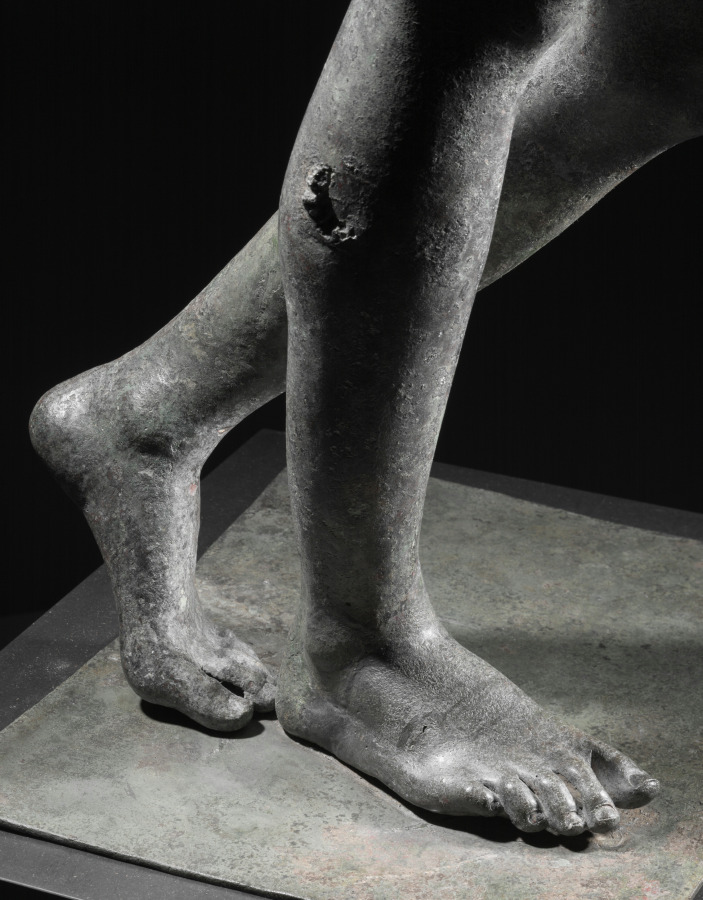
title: The Cleveland Apollo: Apollo Sauroktonos (Lizard-Slayer) or Apollo the Python-Slayer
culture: Greece, Athens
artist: attributed to Praxiteles (Greek, Athenian, c. 400–330 BCE)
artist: or Follower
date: c. 350–200 BCE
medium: bronze, copper and stone inlay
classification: Sculpture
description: The Cleveland Apollo was cast in multiple sections using the indirect lost-wax technique. First, molds were taken from a working model (now no longer known or preserved), which was then reproduced in hollow wax sections, each filled with a clay core. After details were added to the wax models, each was encased in clay. Then, the wax was heated, melted out, and replaced by molten bronze. Once cooled, the hollow bronze sections were fused together and finished, patching flaws and adding inlays and other details. Since the initial model was retained, it could be reused, allowing ancient sculptors to create multiples and variations of favorite works. Thus, remarkably, the Cleveland Apollo may once have been one of several such works. The consistently thin walls of the Cleveland Apollo (mostly 5-6 mm thick), together with the nearly invisible joins between most cast sections, show that it was created by highly skilled sculptors and foundry workers. Close looking reveals several noteworthy features. First, ovals atop the right foot mark a fusion weld, where molten bronze pooled to join separately cast sections. Second, small rectangular bronze patches cover parts of the surface (especially the right hip), each carefully cut and then hammered into place over holes or other casting defects. Inlaid lips, nipples, and eyes (the right ancient stone, the left now a modern replacement) added to the lifelike appearance of the sculpture, contrasting with the once bronze-colored skin. Finally, radiography helps to illuminate hidden features, such as the cast edge of the neck of Apollo.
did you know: Ovals across the top of the right foot show a clear join between separately cast sections.